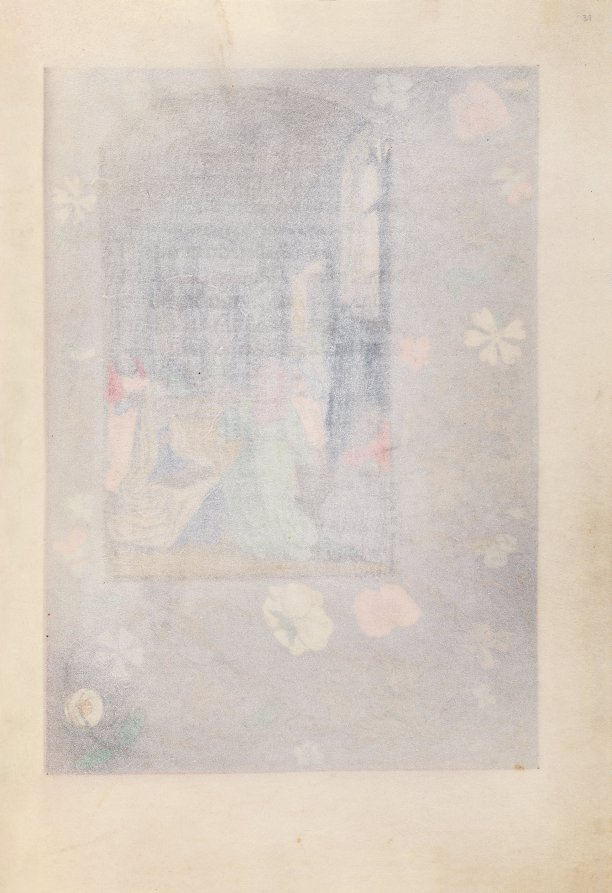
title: Hours of Queen Isabella the Catholic, Queen of Spain: Fol. 31r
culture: Flanders, Ghent and Bruges, late 15th century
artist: Master of the First Prayerbook of Maximillian (Flemish, c. 1444–1519)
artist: and Associates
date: c. 1500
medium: ink, tempera, and gold on vellum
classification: Bound Volume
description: A great lover of Flemish art, Queen Isabella treasured her many devotional books. This deluxe manuscript was created for her private devotions by highly organized and distinctly talented manuscript painters active in Ghent and Bruges. The Ghent-Bruges school represents the culmination of Flemish book painting, whose main features were the use of rich colors, illusionistic effects, a love of landscape, and a strong sense of visual narrative. Manuscripts produced by this circle of artists are renowned for their border decoration featuring a rich variety of realistically painted flowers, scrolling acanthus leaves, birds, and butterflies.